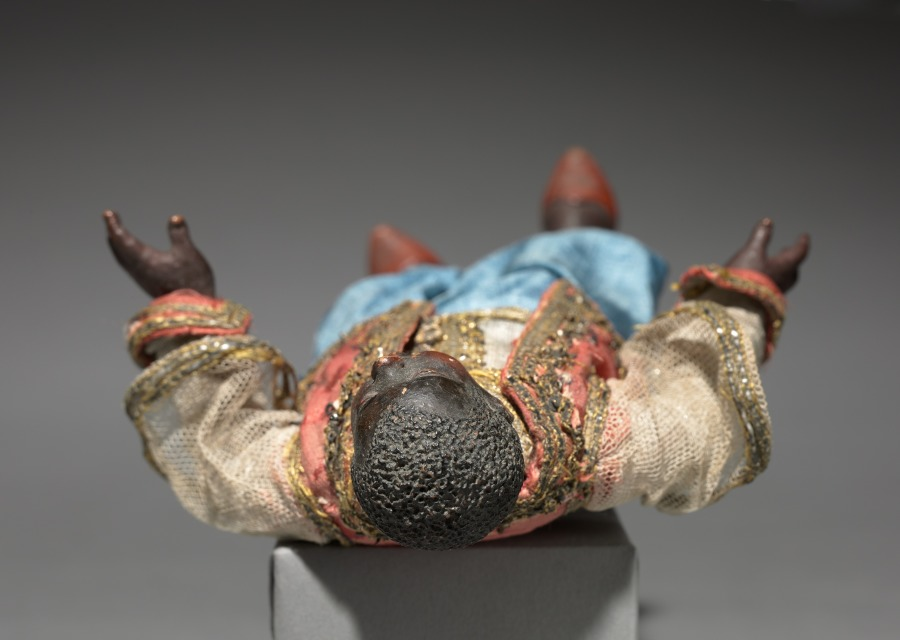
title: Figure from a Crèche: Attendant of the Magi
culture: Italy, Naples, late 18th-early 19th century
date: 1780–1830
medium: painted wood and terracotta with various textiles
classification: Sculpture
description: The practice of creating scenes of the Nativity for the home dates from the early 1700s in Italy, where people began to set up doll-like figures of about a foot or less in height. The custom was particularly popular in Naples around 1800, where crèche scenes (crèche means cradle, or crib) included many figures, whose heads and hands of painted terracotta, stuffed cloth bodies, and clothing adapted from contemporary local costumes gave them an amazingly realistic character. Representations of the birth of Jesus can be traced to the first few centuries of Christianity. Both living creatures and sculptural depictions of them were used from early times. By the late middle ages it was customary to create life-size figures of wood or stone, naturalistically painted, to represent the characters who participated in the events of Jesus's early life. These sculptures were then arranged in scenes illustrating one or both of the most important of these events, the Adoration of the Shepherds and the Adoration of the Magi-the three kings from the East who came to pay homage to the Christ child. Used in churches, these large figures were especially popular in Italy, Central Europe, Spain, and Portugal. This Object in Focus presentation was organized by Henry Hawley, Curator of Renaissance and Later Decorative Arts and Sculpture.